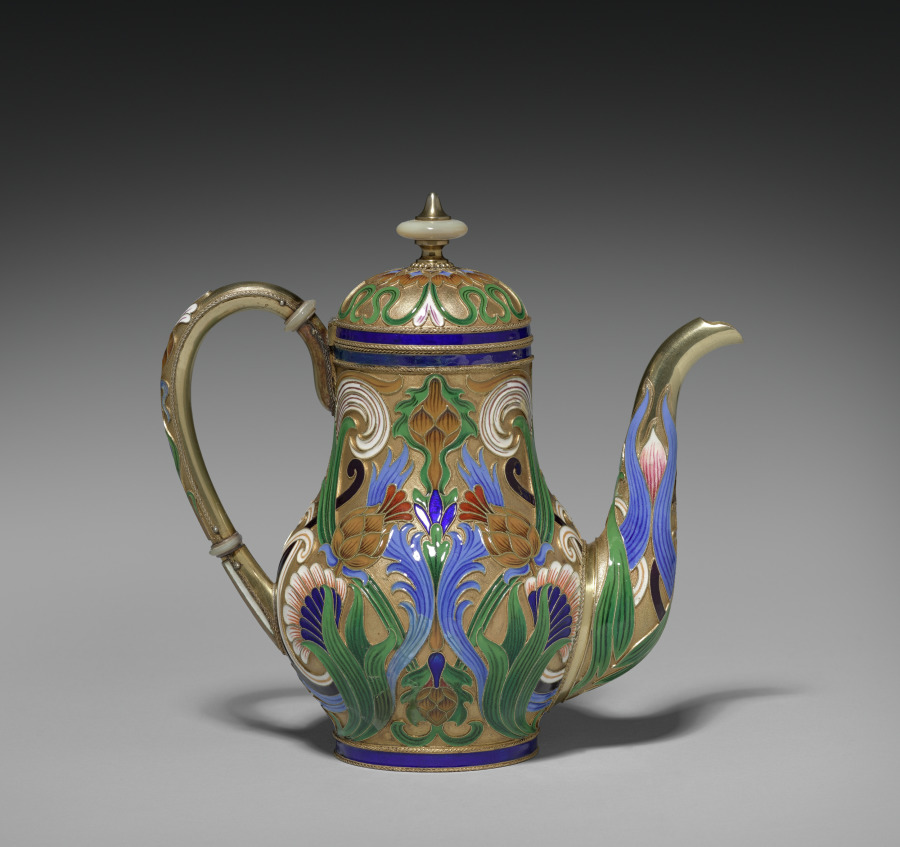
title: Covered Hot Water Pot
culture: Russia, St. Petersburg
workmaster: attributed to Feodor Ivanovich Rückert (Russian, 1840–1917)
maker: House of Fabergé (Russian, 1842–1918)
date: 1887–96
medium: silver gilt, opaque cloisonné enamel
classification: Miscellaneous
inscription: 88, St. George [assay mark for Moscow, 1882-1896]; C. Fabergé (in Cyrillic); double-headed eagle [imperial warrant]; 88; initials of Carl Fabergé (in Cyrillic).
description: Fabergé’s craftsmen in Moscow, especially under the watchful eye of workmaster Feodor Rückert, became known for their work in the pan-Slavic or neo-Russian style, hearkening back to 17th-century motifs of Russian folk art. Often on rather conventional shapes, Rückert and his silversmiths created an explosion of color, achieved through the historic technique of cloisonné enamel in which tiny metal lines are soldered to the surface then filled with glass powders in various colors and fired to create a high gloss finish. The result is a spectacular evocation of the 17th-century originals. Far from mere copies, however, Rückert's designs, such as this tea service, employ naturalistic or abstract motifs in a thoroughly modern adaptation of a remarkable earlier period of Russian art and decoration.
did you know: This covered hot water pot is part of a larger tea set.